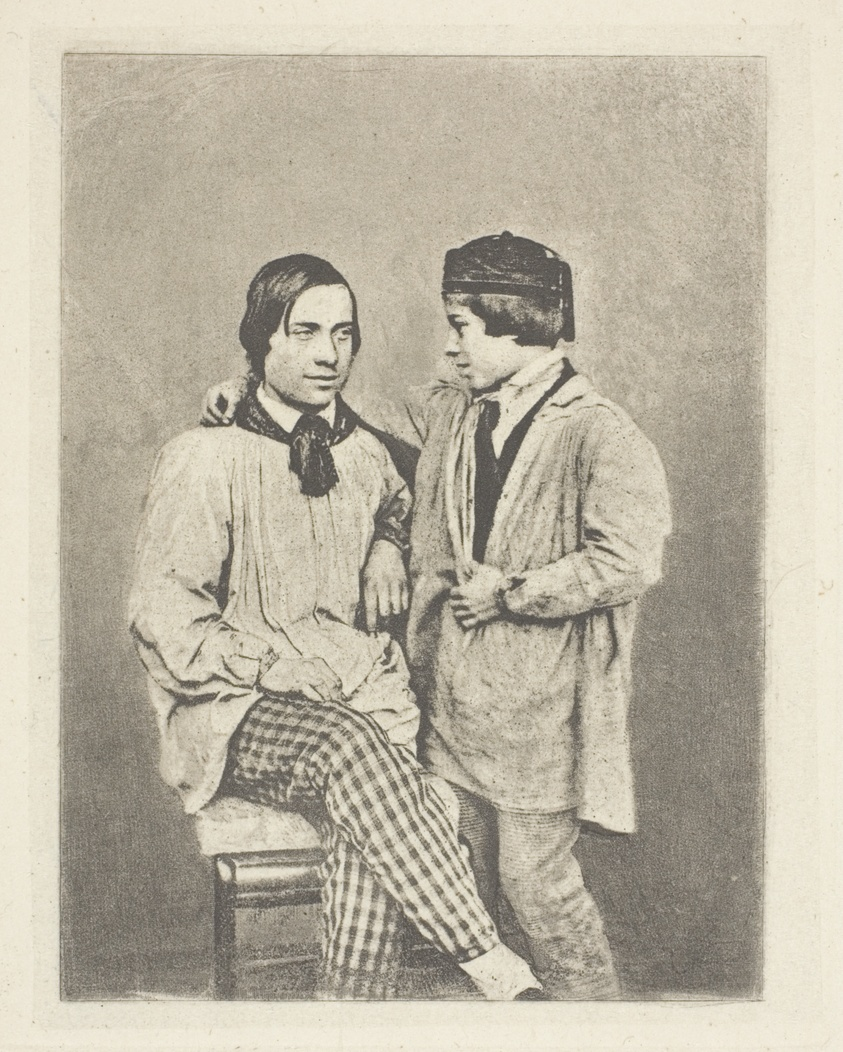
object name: Photograph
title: Peasant Father and His Son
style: 19th century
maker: Armand-Hippolyte-Louis Fizeau (French, 1819–1896)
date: 1842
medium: Photogravure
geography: France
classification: photogravure; photomechanical process; photography; photograph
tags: Collected by Hugh Edwards, portraits: male subject, photography, formal portraits, portraits: child subject, fathers, sons, families, parents, portraits